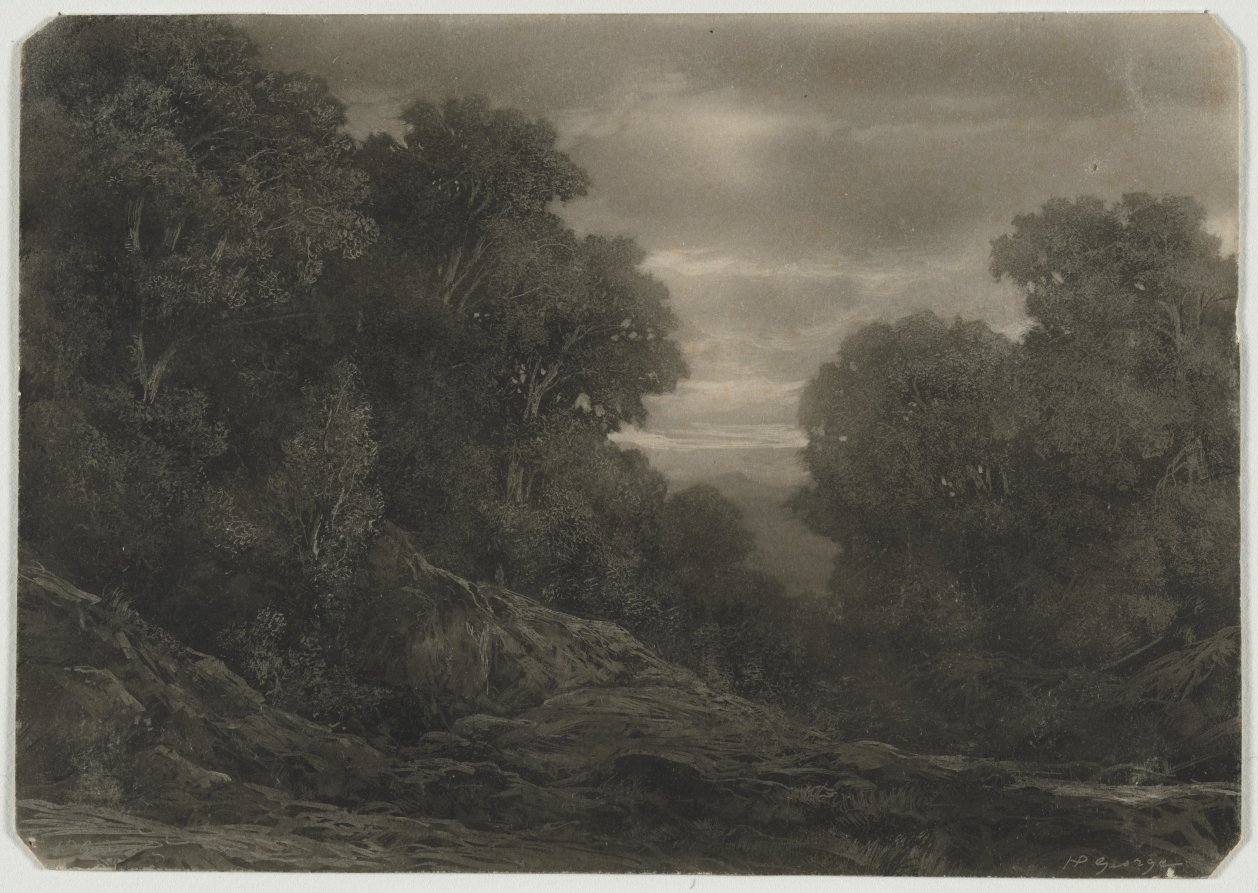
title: Landscape with Trees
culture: Switzerland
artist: Jean-Philippe George (Swiss, 1818–1888)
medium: sepia wash heightened with white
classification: Drawing